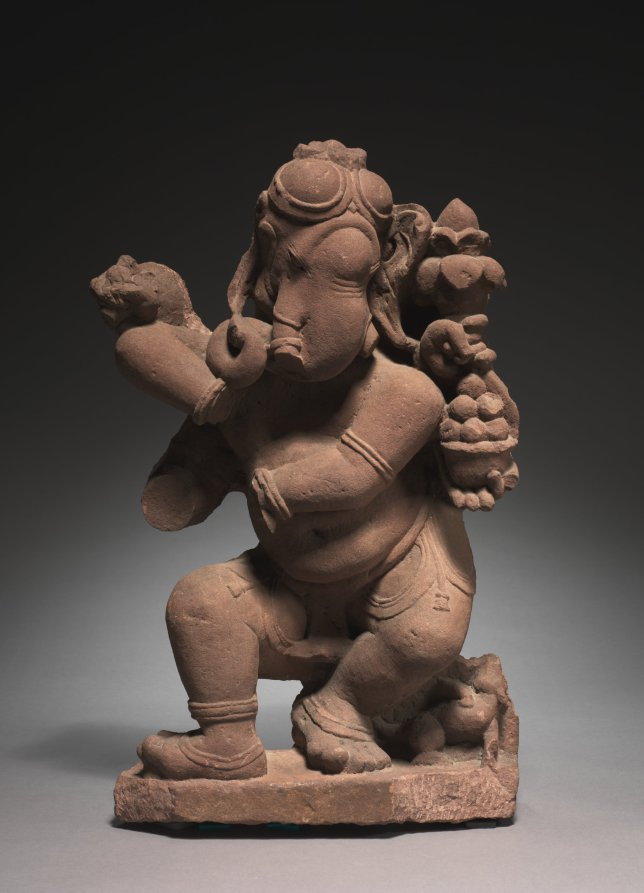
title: Dancing Ganesha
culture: Central India, Madhya Pradesh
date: c. 1000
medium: sandstone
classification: Sculpture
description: The name Ganesha means "lord (isha) of the demonic dwarfs (gana)," part of Shiva's entourage. They dance and imitate Shiva in humorous ways that inspire his followers' affection. In this sculpture Ganesha's dance mimics the dance of Shiva. Ganesha has six arms instead of four, and he holds a bowl of sweet cakes and a radish instead of a tongue of flame.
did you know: Ganesha's mount is the rat, which evokes full granaries and the prosperity and abundance that they imply.